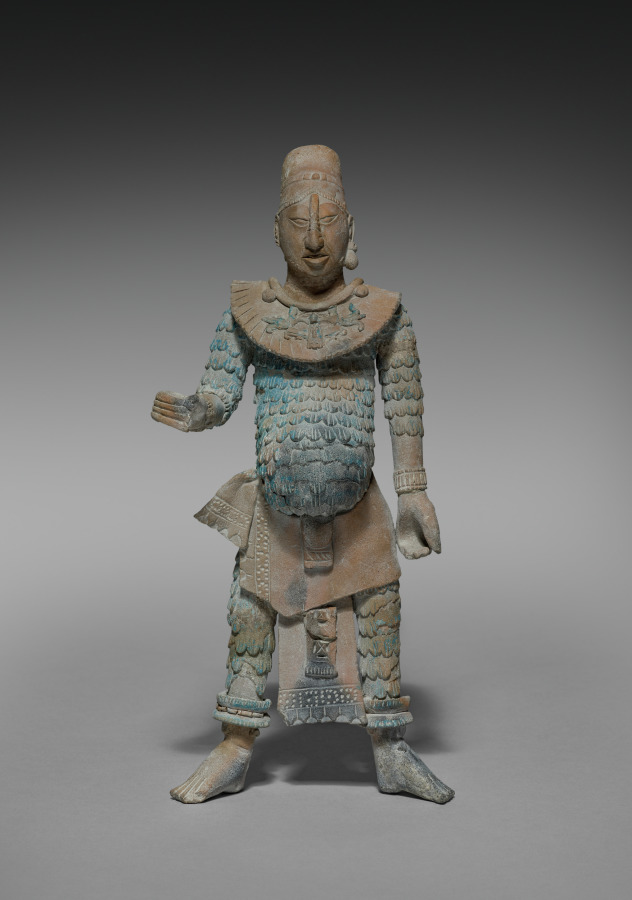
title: Warrior Figurine with Removable Headdress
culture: Mexico, Yucatán, Jaina Island region, Campeche, Maya style (250-900)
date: 600–900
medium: earthenware with pigment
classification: Sculpture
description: The major offerings placed in the Maya graves of Jaina Island were ceramic figurines, some of Mesoamerica's finest, that depict deities and humans in a variety of roles. This warrior, his headdress removable, once probably held weapons and wears either quilted cotton armor or the feathered uniform of a military order. We don't know why such figures are often pot-bellied.